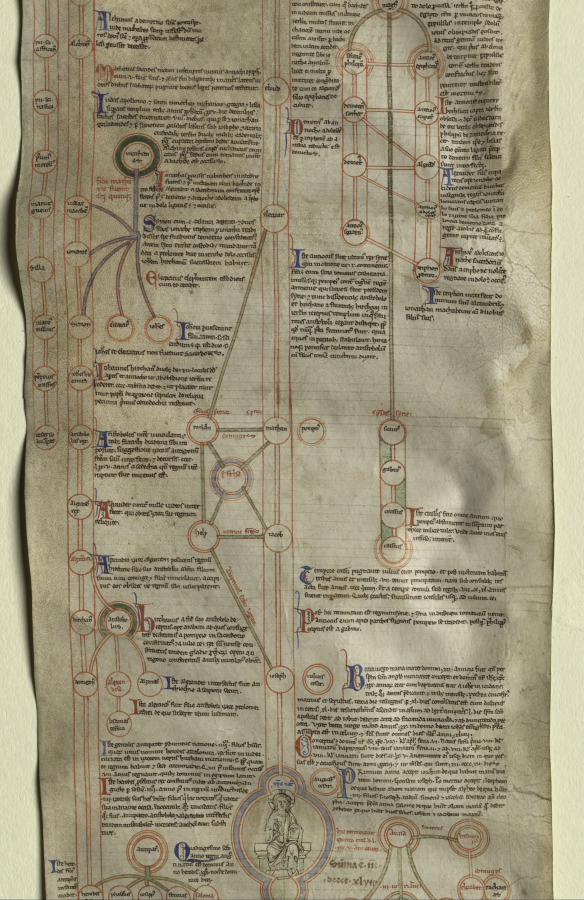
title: Peter of Poitiers's "Compendium Historiae in Genealogia Christi"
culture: England, Canterbury, 13th century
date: c. 1220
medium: ink and tempera on a vellum roll of four membranes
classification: Manuscript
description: This manuscript roll, composed of four membranes formerly stitched together in a continuous roll about nine feet long, has been divided in the middle for easier visibility and study. The text is an abridgment of biblical history focused on the descent of Christ from Adam. It was written by Peter of Poitiers (about 1130–1205), who taught theology and history in Paris and was widely copied. The present roll is an English copy of Peter's text made shortly after his death. Although manuscript rolls were hung on the walls of a classroom as instructional aids to students, some of them have value beyond their textual and historical interest because of the fine quality of their drawings, as seen here. A comparison with Canterbury manuscripts and stained glass of around 1220 is the basis for the attribution to Canterbury. Peter of Poitiers's aim in this project was to assist students prevented from mastering biblical history because of its length and because they were too poor to own books. His text on roll is the briefest possible summary of biblical history. It is arranged in six historical stages, denoting the six ages of the world, as decreed by theological tradition. The first five ages were inaugurated by Old Testament individuals: Adam, Noah, Abraham, David, and Sedecias. The birth of Christ heralded the sixth stage. Beginning at the top of the first membrane, the text consists of brief biographical entries on the ancestors of Christ (Adam, Noah, Abraham, Moses, and David) and other biblical personalities. These extend to the birth of Christ on the fourth membrane, ending with accounts of Hebrew and Roman kings and the Apostles. Each compendium shows the names of the ancestors inscribed within circles, those of direct descent placed vertically in a central column, others scattered in clusters to the right and left. The decoration of the roll consists of a series of medallions of diverse geometrical frames filled with either a figural drawing or a diagram. The style of these pen-and-ink drawings, some illuminated in tempera or tinted with wash, stems from English manuscript and glass painting attributed to the school of Canterbury Cathedral. The style of the museum's illustrations is so close to the stained glass panels made for Trinity Chapel at Canterbury (about 1220) to suggest that an artist active as a glazier in the Cathedral workshop may also have executed the manuscript. In the least, the painter of the roll manuscript was familiar with the style of the painted glass, and on this basis, a date of about 1220 seems appropriate. Additional evidence is supplied by a psalter illuminated at Canterbury shortly before 1220. The figurative scenes in this psalter were apparently illustrated by the same hand that executed the line and wash drawings in the museum's roll.